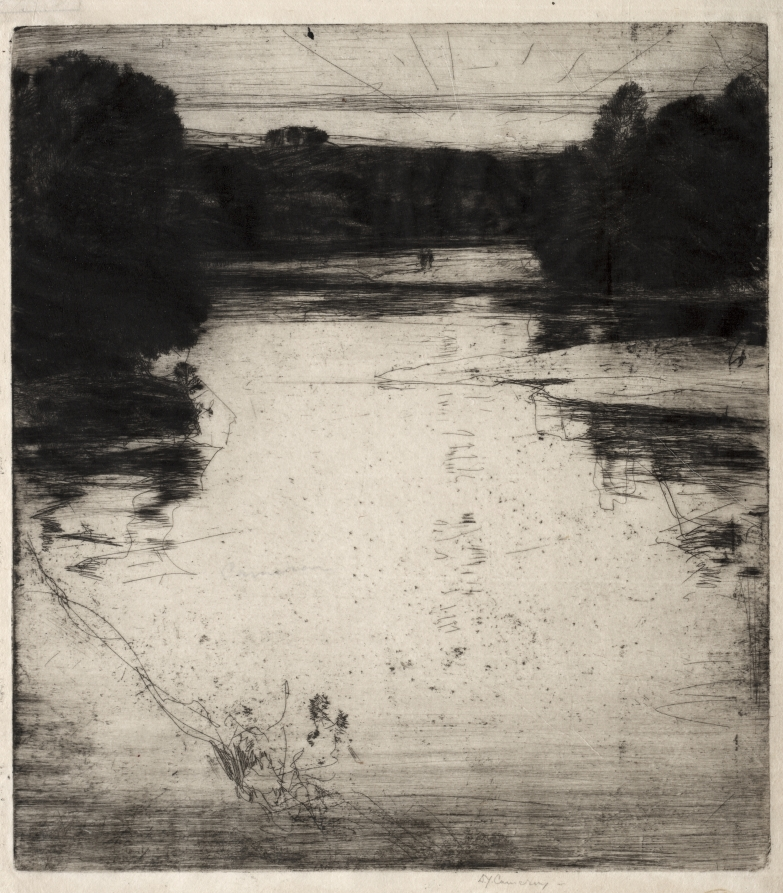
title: Afterglow on the Findhorn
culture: England, 20th century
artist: David Young Cameron (British, 1865–1945)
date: 1907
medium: etching and drypoint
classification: Print